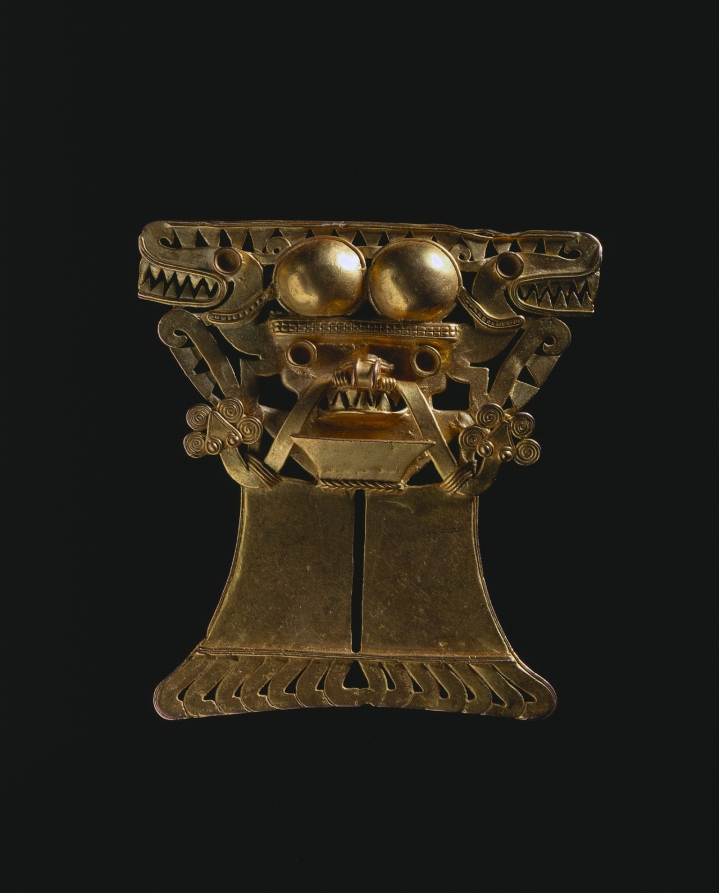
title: Animal-Headed Figure Pendant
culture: Panama, Veraguas or Parita style, c. 1000-1550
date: c. 1000–1550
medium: cast gold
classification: Metalwork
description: The culture area that extends from southern Central America to northern South America is generally referred to as the Intermediate Region because of its location between the two high culture zones of Mesoamerica and the central Andes. Research to date indicates that the pre-Columbian peoples of the Intermediate Region were organized into small, competitive chiefdoms, rather than large-scale states or empires. Despite political competition and warfare, trade in prestige goods such as jade and gold was common. Gold, obtained through panning and mining, was worked by hammering and lost-wax casting to produce intricate and showy personal ornaments. The pendant represents a supernatural being, perhaps a fantastic crocodilian. It has projecting, tubelike eyes, a snout full of sharp teeth, and snake-headed streamers emanating from the nostrils. The simplified lower body consists of broad, flat legs, with large, curved talons at the ends of the feet. The elaborate headdress includes two central semidomes, flanked by fierce-looking profile crocodilians.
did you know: The figure wears an elaborate headdress that is flanked by fierce-looking crocodilians in profile.